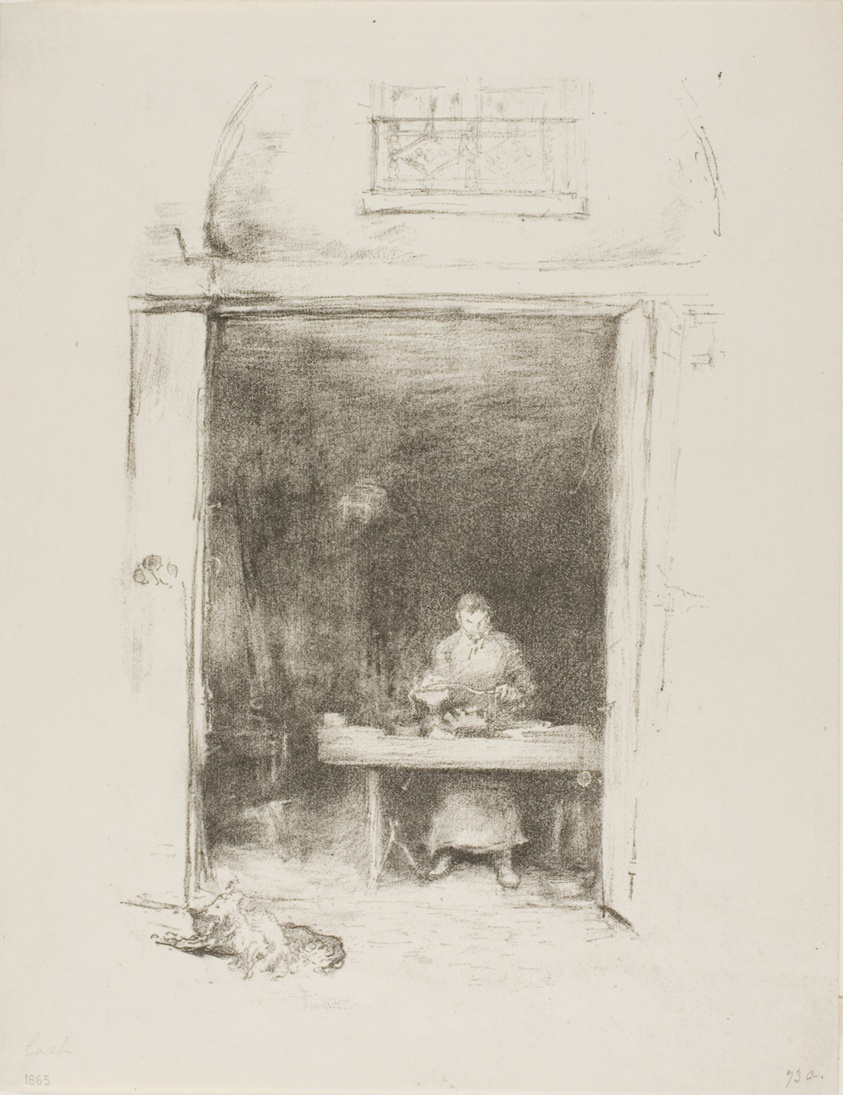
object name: Print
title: The Smith, Passage du Dragon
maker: James McNeill Whistler (American, 1834-1903)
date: 1894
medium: Transfer lithograph in black with stumping, on ivory wove proofing paper laid down on a heavy backing sheet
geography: United States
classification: transfer lithograph; lithograph; print; prints and drawing; paper